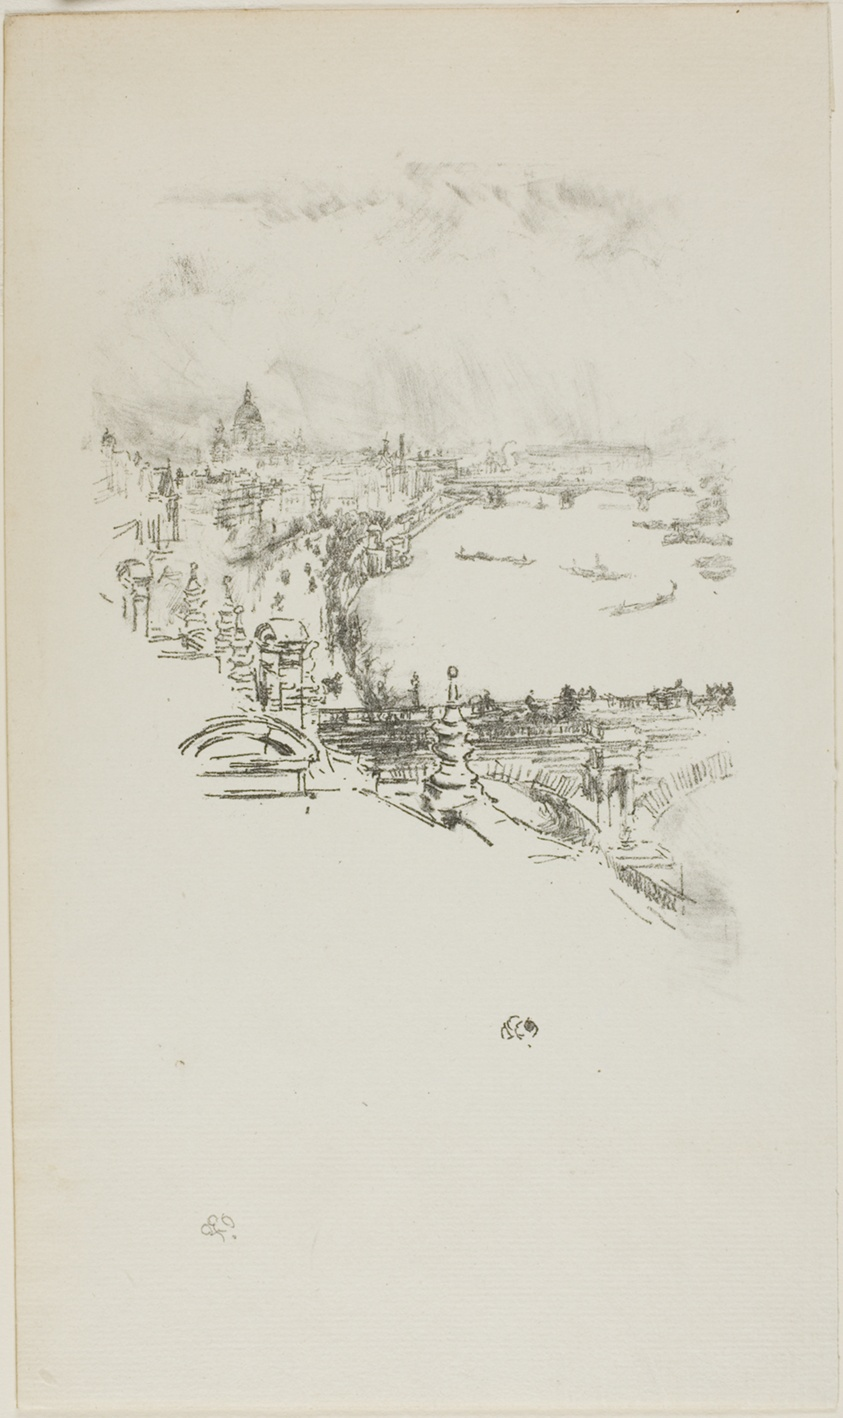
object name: Print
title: Little London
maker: James McNeill Whistler (American, 1834-1903)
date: 1896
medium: Transfer lithograph in black with stumping, on ivory laid paper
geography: United States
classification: transfer lithograph; lithograph; print; prints and drawing; paper